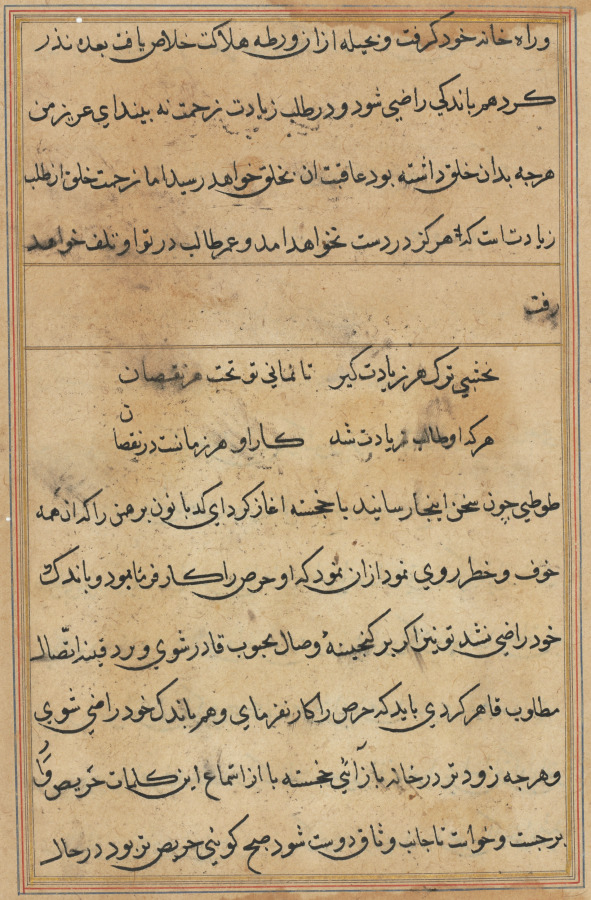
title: Page from Tales of a Parrot (Tuti-nama): text page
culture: Mughal India, court of Akbar (reigned 1556–1605)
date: c. 1560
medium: gum tempera, ink, and gold on paper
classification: Painting